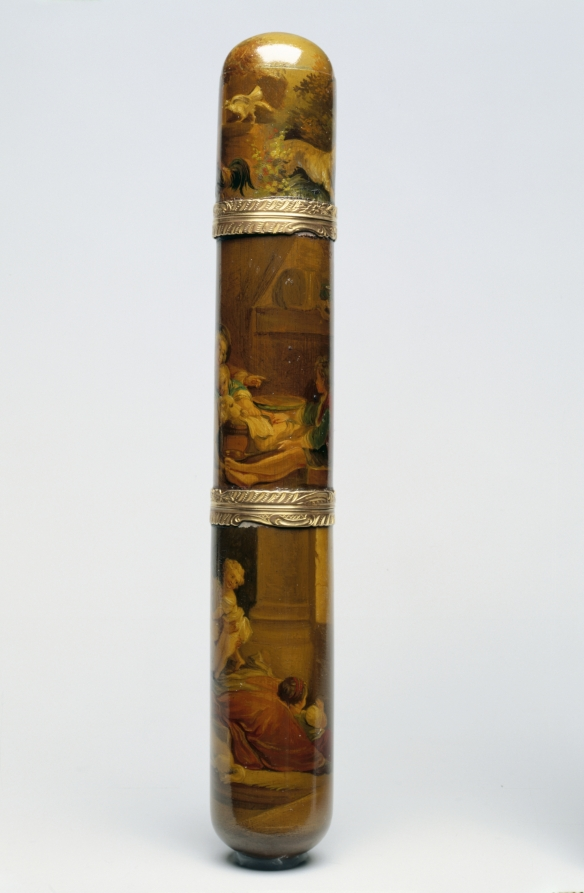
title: Perfume Case (Etui flaconnier)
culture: France, 18th century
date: c. 1780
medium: painted wood with gilt metal mounts, tortoiseshell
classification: Cosmetic Objects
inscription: Unmarked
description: Resting inside this case is a small octagonal crystal flask that would have held perfume. The painted miniatures are decorated with vernis martin, a popular varnish that imitated East Asian true lacquer. These scenes of rural merriment were often miniature reproductions of well-respected artists of the period. The depiction of three children and a dog on the lower portion of the case was drawn from Jean-Honoré Fragonard’s The Happy Family (L’heureuse fécondité) (1777).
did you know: Perfume was an important part of the French toilette, a lengthy ritual of washing and dressing practiced by members of the French social elite.